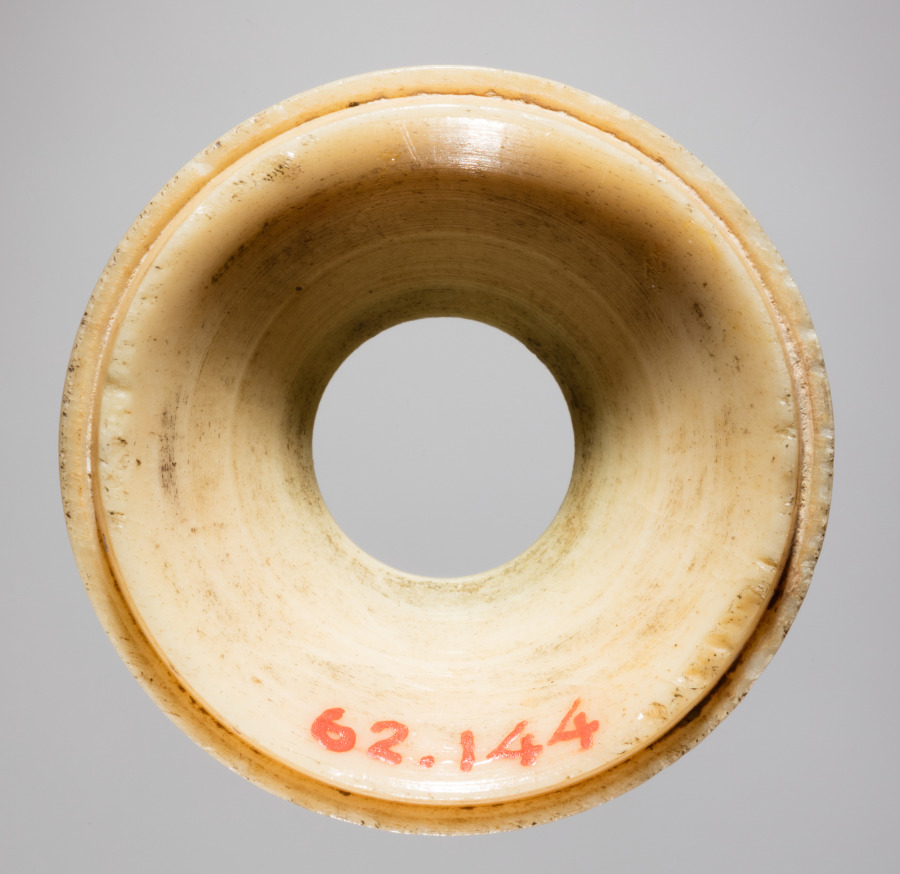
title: Spindle Whorl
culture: Iran, early Islamic period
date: 700s - 900s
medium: bone, incised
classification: Spindle Whorl